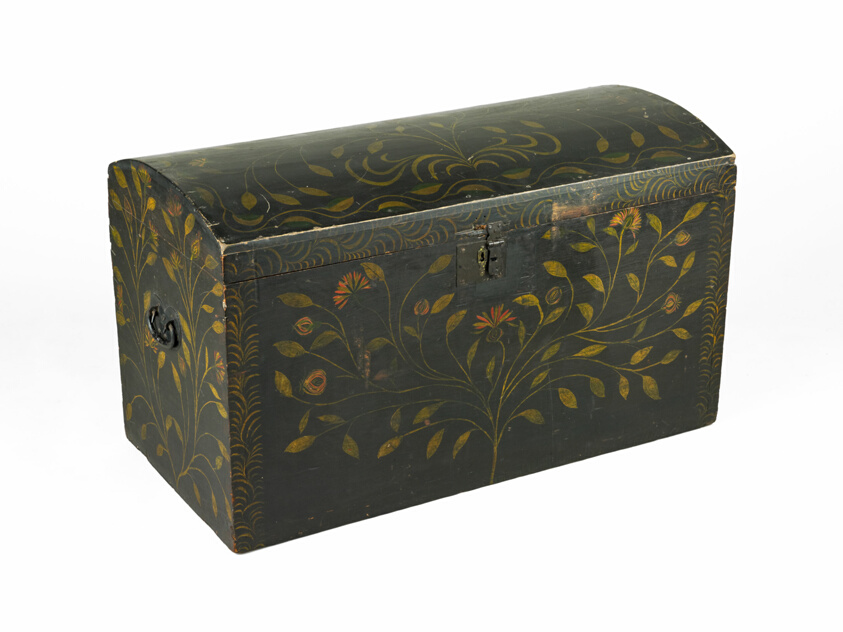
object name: Furniture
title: Chest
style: Folk Art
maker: Artist unknown (American, active 19th century); New England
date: 1800–25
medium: White pine, paint, and metal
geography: New England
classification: case furniture; furniture; american decorative arts; american arts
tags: furniture